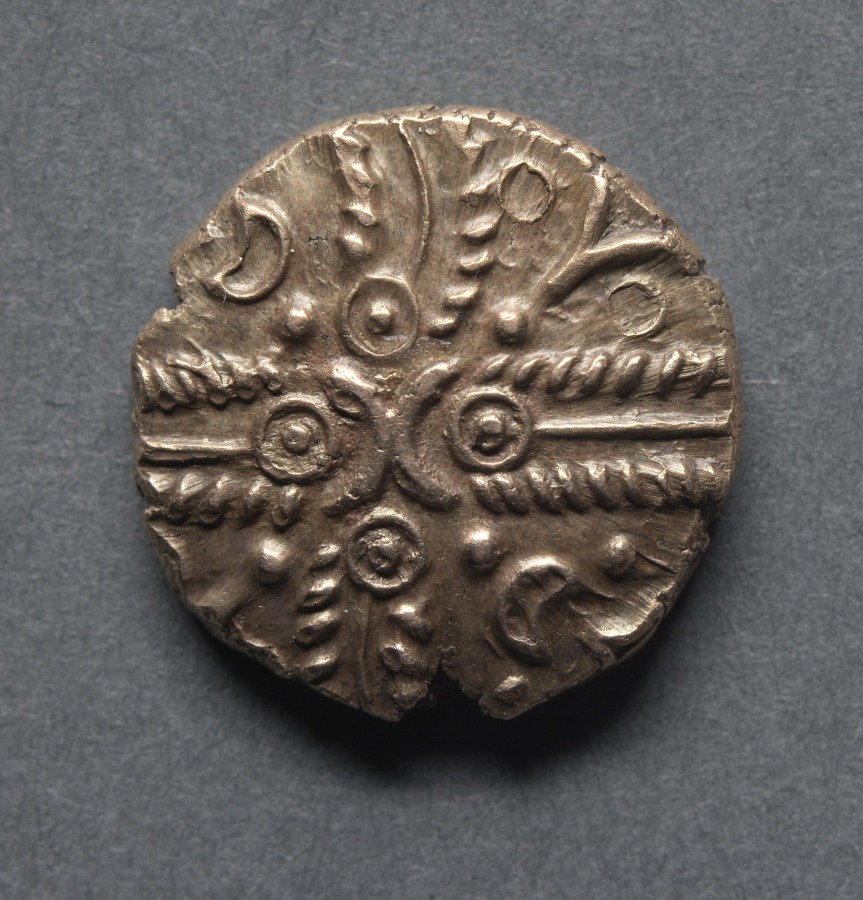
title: Tasciovanus Stater: Crossed Wreaths (obverse); Horse and Bucranium (Head of Ox) (reverse)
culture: England, Catuvellauni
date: 20 BCE–10 CE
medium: gold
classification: Coins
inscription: TASCIAV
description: Tasciovanus was the first king of the Catuvellauni to put his name on his coins; otherwise he is completely unknown to history. It is based on earlier coin designs with the addition of a legend containing an abbreviation of his name and a bucranium (head of an ox) above the horse. Often earlier coins are badly executed, causing elements of the design to be cut off, as seen here.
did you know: The Catuvellauni were a Celtic tribe or state of southeastern Britain before the Roman conquest.